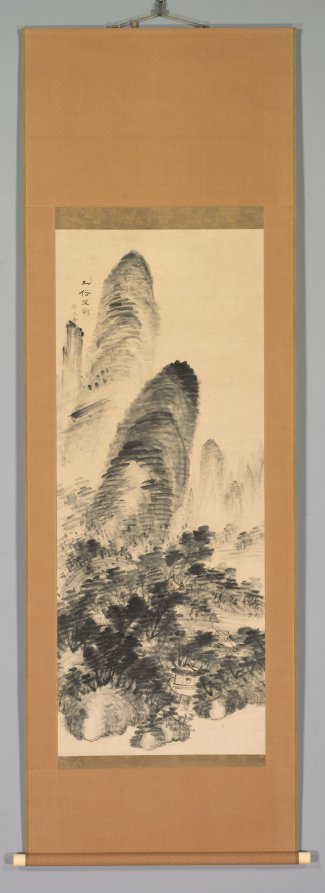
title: Forbidden to the Vulgar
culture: Japan, Edo period (1615–1868)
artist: Uragami Gyokudō (Japanese, 1745–1820)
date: late 1800s-early 1900s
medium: hanging scroll; ink on paper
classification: Painting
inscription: Inscriptions upper left are title and signature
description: Gyokudo painted in the Nanga style (literary men's school of painting), originally influenced by 18th-century Chinese painting. Most of his landscapes are variations on the theme of tall mountains and remote huts. Note the spontaneity of the brushstrokes and how the dry, rough ink works with the texture of the paper. Born to an ancient samurai family, Gyokudo was trained in the Chinese classics and studied painting, poetry, and the koto (kind of zither). He devoted himself to art and music, painting, drinking, and playing the koto as he wandered about the country.